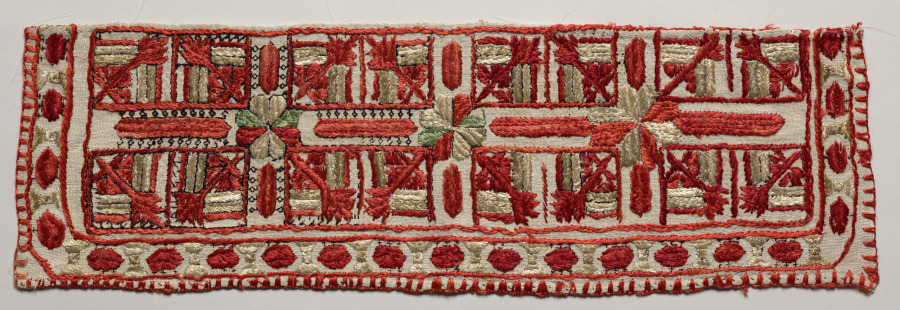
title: Panel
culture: Russia, Tambov province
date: c. 1780–1840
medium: Linen: plain weave; silk; embroidery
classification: Embroidery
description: This Russian embroidered panel was likely used to embellish the end of a bathing towel. Textiles of this type are valuable for their fine embroidery of ancient folk motifs, ritual significance, exemplification of the role of textiles in their society, and in this case, connection to a prominent woman collector, Natalia de Shabelsky, without whom this textile and others like it might have been lost.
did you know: Embroidering the ends of everyday towels was a common folk tradition in many cultures because it displayed the skill of the mother or daughter who stitched them.